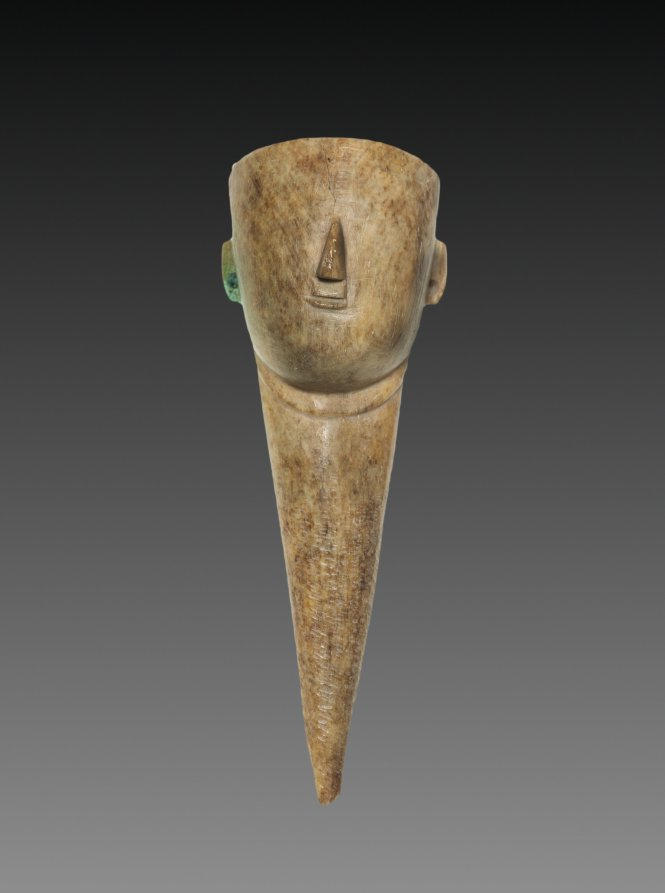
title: Figurine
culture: Iran, early Islamic period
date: 700s–900s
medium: carved bone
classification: Miscellaneous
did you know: Each earlobe is pierced. One is empty, while the other is filled with a substance which has turned the adjacent surface green.